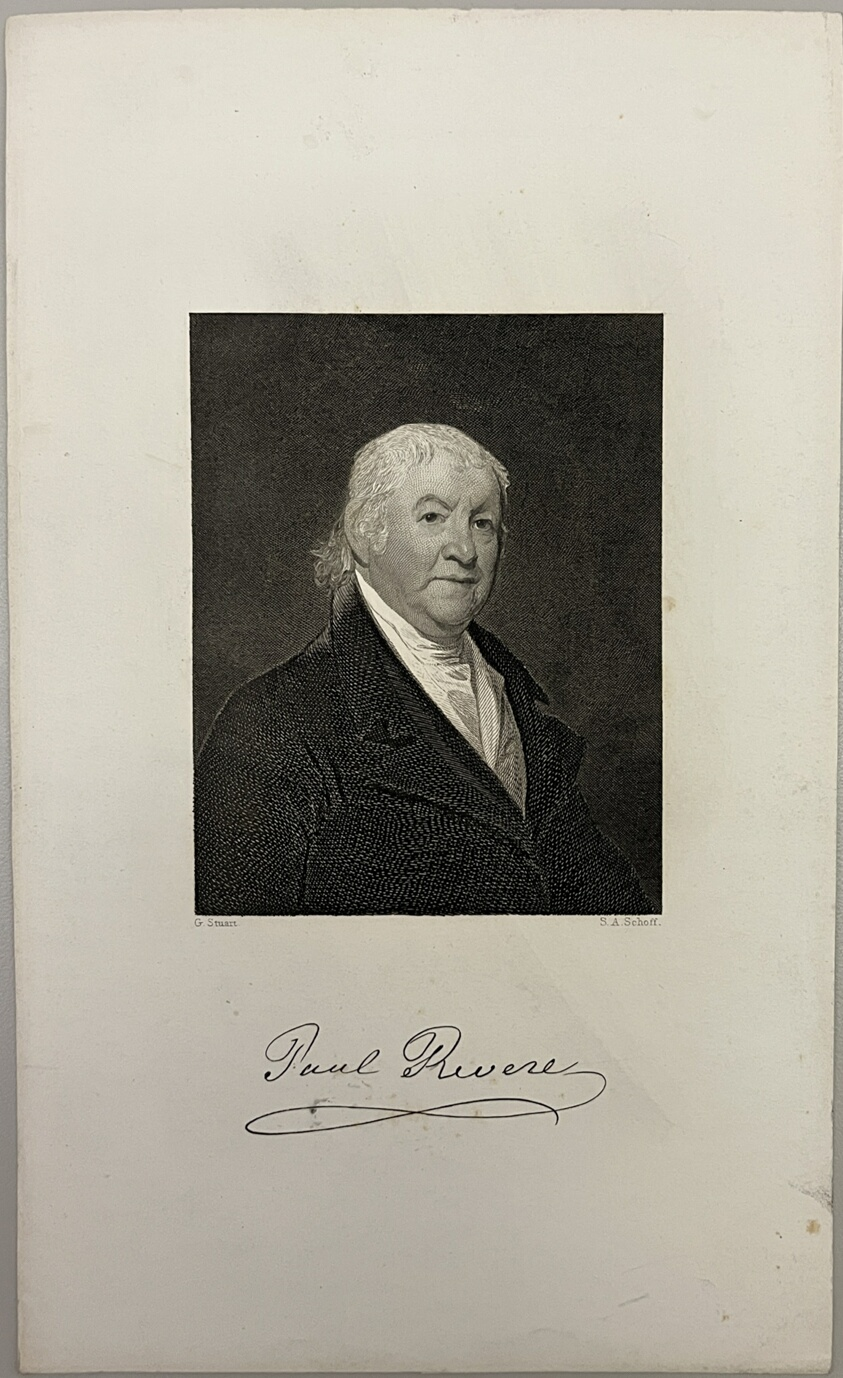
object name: Print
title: Paul Revere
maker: Stephen Alonzo Schoff (American, 1818-1904); after Gilbert Stuart (American, 1755-1828)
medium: Etching on paper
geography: United States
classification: reproduction; print; prints and drawing